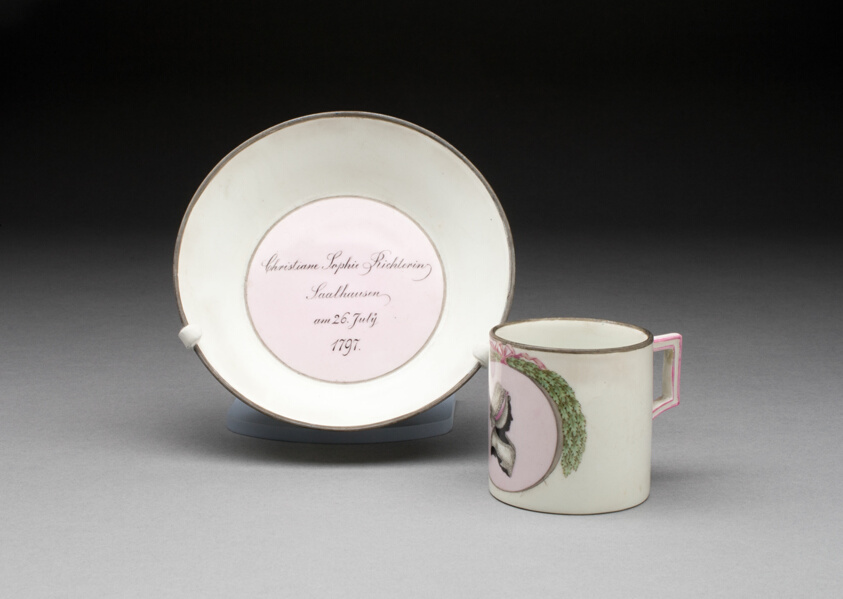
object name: Ceramics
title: Cup and Saucer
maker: Meissen Porcelain Manufactory; German, founded 1710; Decorated by Samuel Mohn; German, 1761-1815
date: 1797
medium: Hard-paste porcelain and polychrome enamels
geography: Meissen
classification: drinking vessel; teaware; porcelain; european decorative arts; ceramics